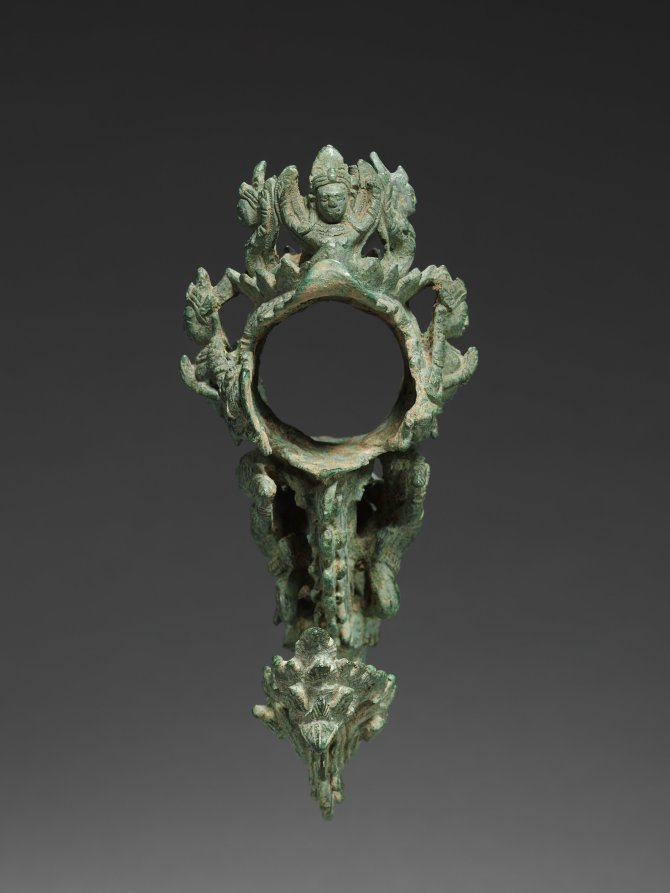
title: Palanquin Hook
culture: Cambodia, probably Angkor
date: 1175–1230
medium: bronze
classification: Sculpture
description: When members of the royal family or priesthood traveled in a public festival procession or to a temple to make offerings or participate in a ceremony, they would be carried in a palanquin, or a covered litter. Portable objects of veneration, such as bronze images or a sacred fire, were also carried on palanquins. The palanquins had wooden poles, hanging seats or raised platforms, and bronze fittings cast in intricate forms and gilt, lending the palanquins a sumptuous quality. This hook once supported a bronze ring from which hung a seat, like a hammock or swing. A wooden pole would have passed through the hollow socket at the top and was carried on the shoulders of bearers. The hook segment ends in the face of a garuda, a man-eagle with a prominent beak, stylized wings, and feathers. Figures indicative of devotion and success, including pairs of elephants, crown the fitting.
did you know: In the middle of the hook, a figure holding a sword in one hand and his extended leg in the other is in a dance pose expressing vigorous attack.